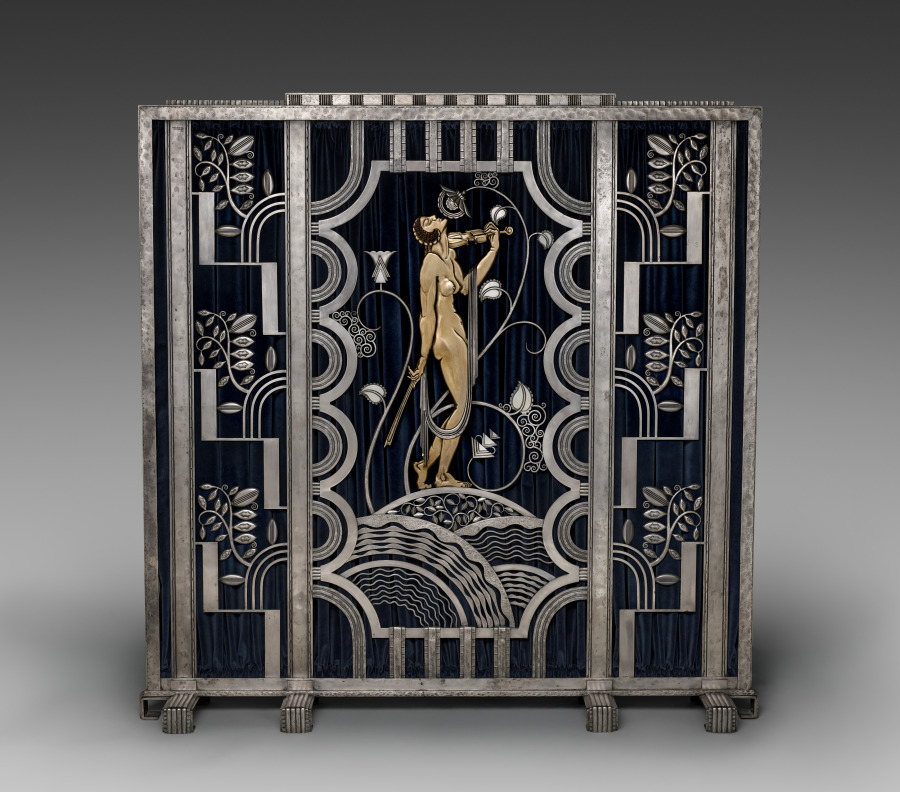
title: Muse with Violin Screen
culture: America, Ohio, Cleveland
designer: Paul Fehér (American, born Hungary, 1898–1990)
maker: Rose Iron Works (America, Ohio, Cleveland, est. 1904)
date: 1930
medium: Steel, brass; silver and gold plating, cotton velveteen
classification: Metalwork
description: Since the early years of the 20th century, the Rose Iron Works, a Cleveland supplier of architectural ornament, has produced distinguished metalwork. The company’s founder, Martin Rose, was born in Austria-Hungary and studied ornamental metalsmithing in Vienna prior to immigrating to Cleveland in 1902. In the 1920s, he hired a talented young Parisian designer, Paul Fehér, to work for the firm. Fehér’s designs, culminating in this massive screen, brought a modern European sensibility to the Rose Iron Works production. With its geometric patterning, highly stylized and abstracted natural forms, and the central figure reminiscent of the celebrated jazz singer Josephine Baker, this screen reflects the classic motifs of Art Deco design.